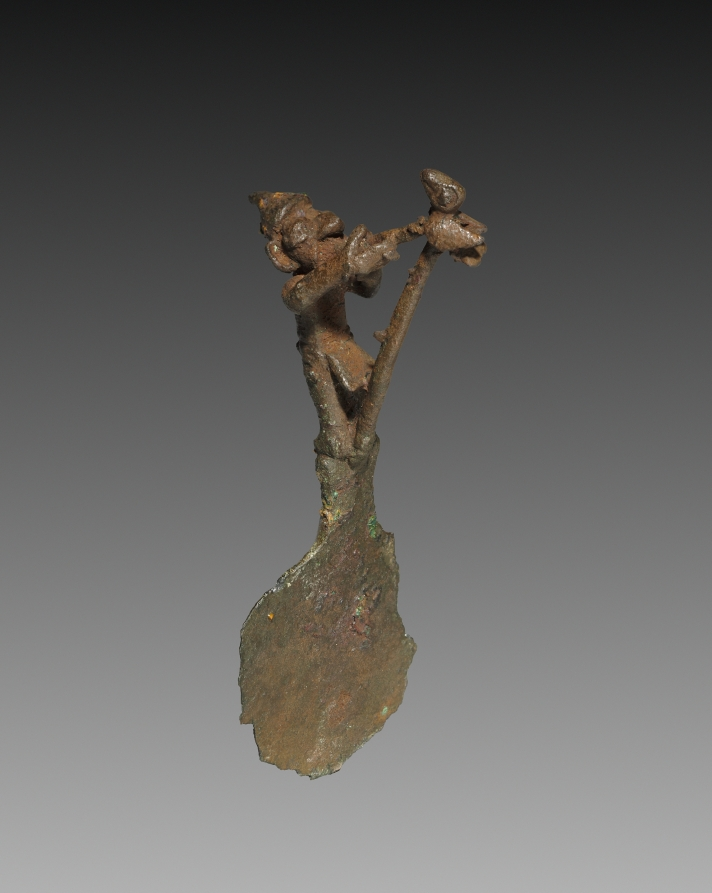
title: Knife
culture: Peru, Inca Culture, 15th-16th century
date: 1400s-1500s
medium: bronze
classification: Metalwork